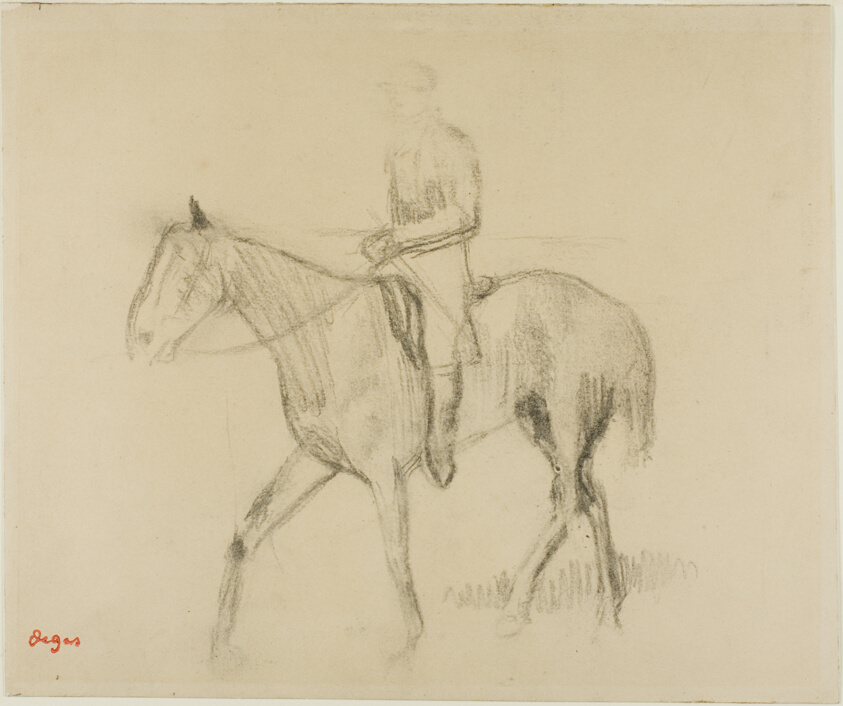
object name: Drawing and Watercolor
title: Horse and Rider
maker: Edgar Degas; French, 1834-1917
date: 1887/90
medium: Charcoal on cream card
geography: France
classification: charcoal; drawings (visual works); prints and drawing; paper